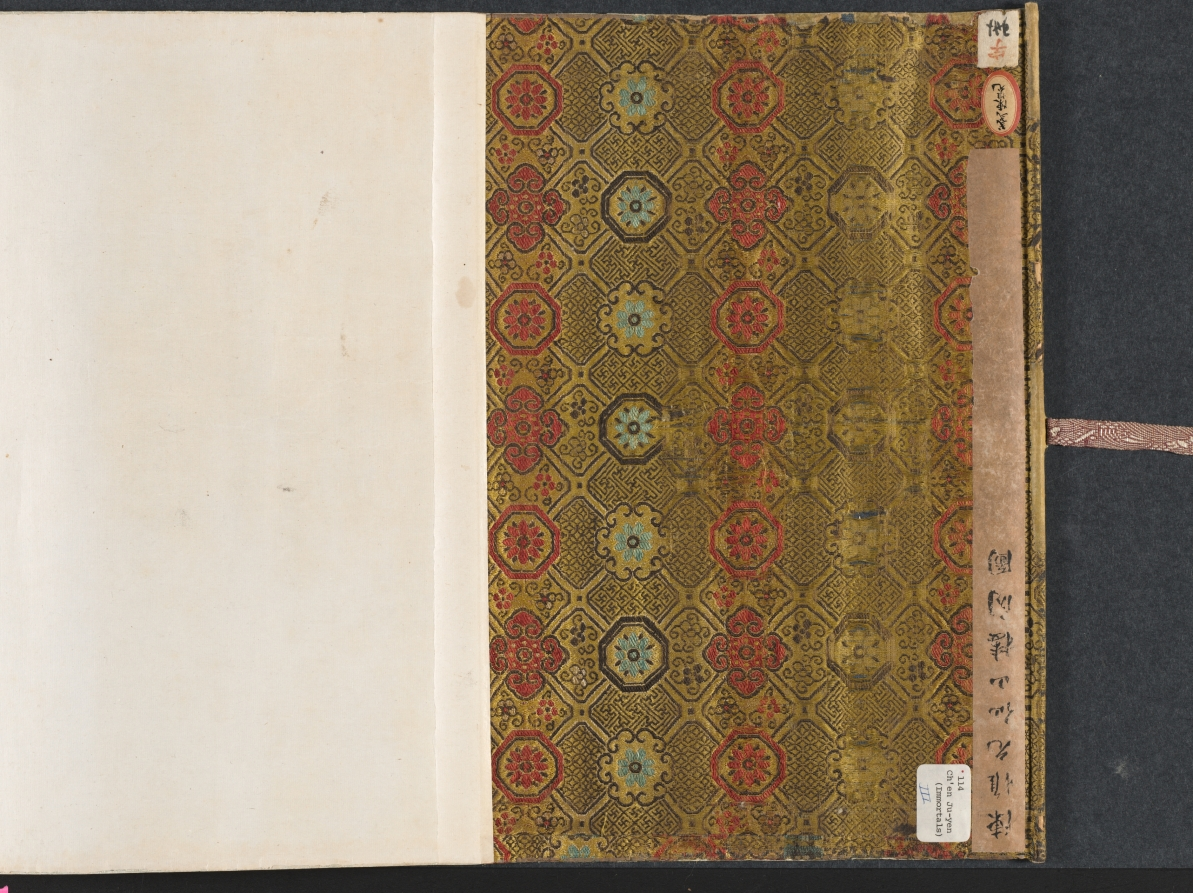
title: Mountains of the Immortals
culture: China, Yuan dynasty (1271-1368)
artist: Chen Ruyan (Chinese, c. 1331–1371)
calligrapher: Ni Zan (Chinese, 1301–1374)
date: 1300–1370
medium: Handscroll; ink and color on silk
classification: Painting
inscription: 1 inscription, 3 colophons, and 37 seals: 1 inscription, dated 1371, by Ni Zan 倪瓚 (1301-1374); 17 seals of Xiang Yuanbian 項元汴 (1525-1590); 4 seals of Chu Chih-ch'ih (late Ming Dynasty); 1 seal of Liang Qingbiao 梁淸標 (1620-1691); 1 seal of Gao Shiqi 高士奇 (1645-1704); 4 seals of Lu Xinyuan 陸心源 (1834-1894); 1 colophon, dated 1908, and 5 seals of Jing Xian 景贒; 1 colophon, dated 1915, by Lung Yu; 1 colophon, dated 1932, and 2 seals of Wu Mei; 3 seals unidentified.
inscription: 仙山圖， 陳君惟允所畫。 秀潤清遠， 深得趙榮祿筆意。 其人已矣， 今不可復得。 辛亥十二月二日倪瓚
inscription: Colophon by Jing Xian 景贒: The preceding Land of Immortals is an authentic work of the Yuan master, Chen Weiyun 陳惟允. According to the Yu yi bian 寓意編 by Du Mu 都穆of the Ming Dynasty, the painting was seen at the home of Chen Mengxian 陳孟賢 [c. 1500], a hermit. It is also recorded in Yu yi lu 寓意錄 of the present [Qing] era. The dimensions and the seals are all correct. When the painting went into the possession of Liang Qingbiao 梁淸標, the silk was already quite dilapidated. The only thing now missing, however, is the one line of writing by Xiang Zijing 項子京 [Xiang Yuanbian 項元汴] who records the original price he paid, being fifteen taels of silver. This must have been cut off by the dealer, which nevertheless did no harm to a masterpiece such as this. Jing Xian recorded this in the second month of the maoshen year [1908].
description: The landscape in deep green tones offers a view into a secluded mountain valley, populated by ancient figures surrounded by deer and cranes, all under high pine trees. A red-robed immortal in the air steers his crane toward the paradise land. This idyllic scene was presumably created amid the tumultuous transition from the Yuan to the Ming dynasty. Chen from Suzhou supported major rebel leaders, first Zhang Shicheng (1321–1367) with his base in Suzhou and then his rival Zhu Yuanzhang in Nanjing, after the latter had established the Ming dynasty. Chen was executed in 1371.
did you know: Such blue and green landscapes often evoke nostalgia for the idealized ancient times.